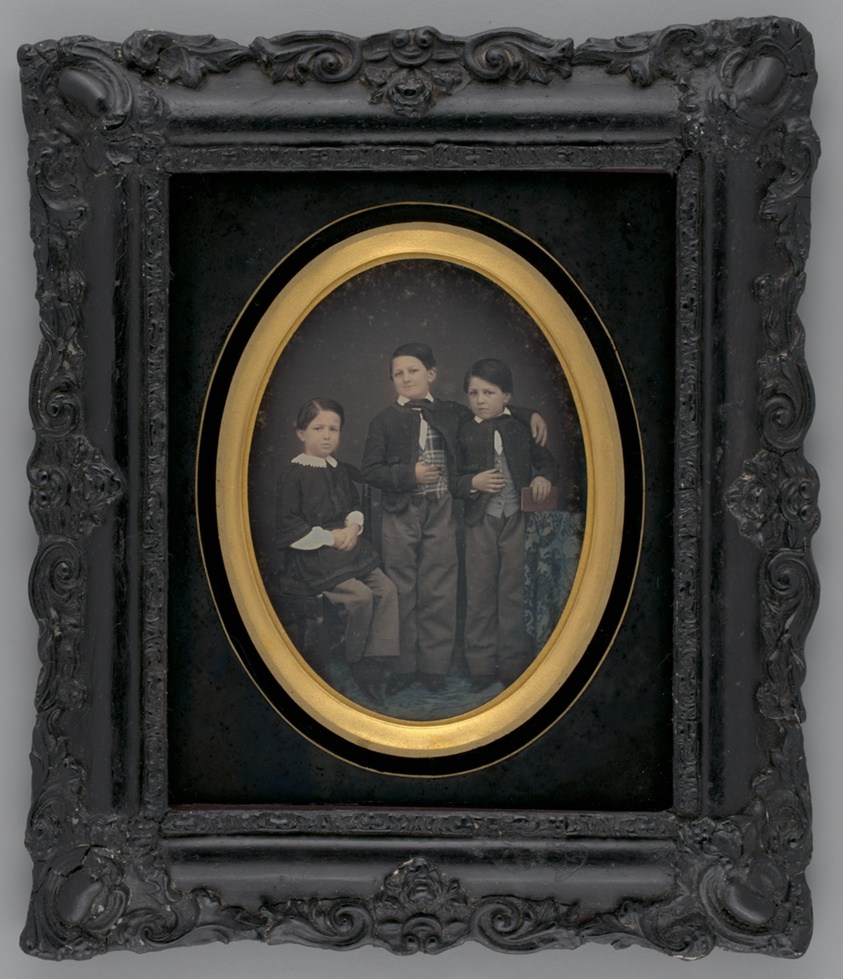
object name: Photograph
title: Untitled (Portrait of Three Boys)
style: 19th century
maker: Unknown maker; American, 19th century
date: 1865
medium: Daguerreotype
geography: United States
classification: portrait; photograph; photographic process; photography; portrait; daguerreotype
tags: lundberg collection, portrait, portraits: multiple subjects, children, people, boys, portraits, portraits: child subject